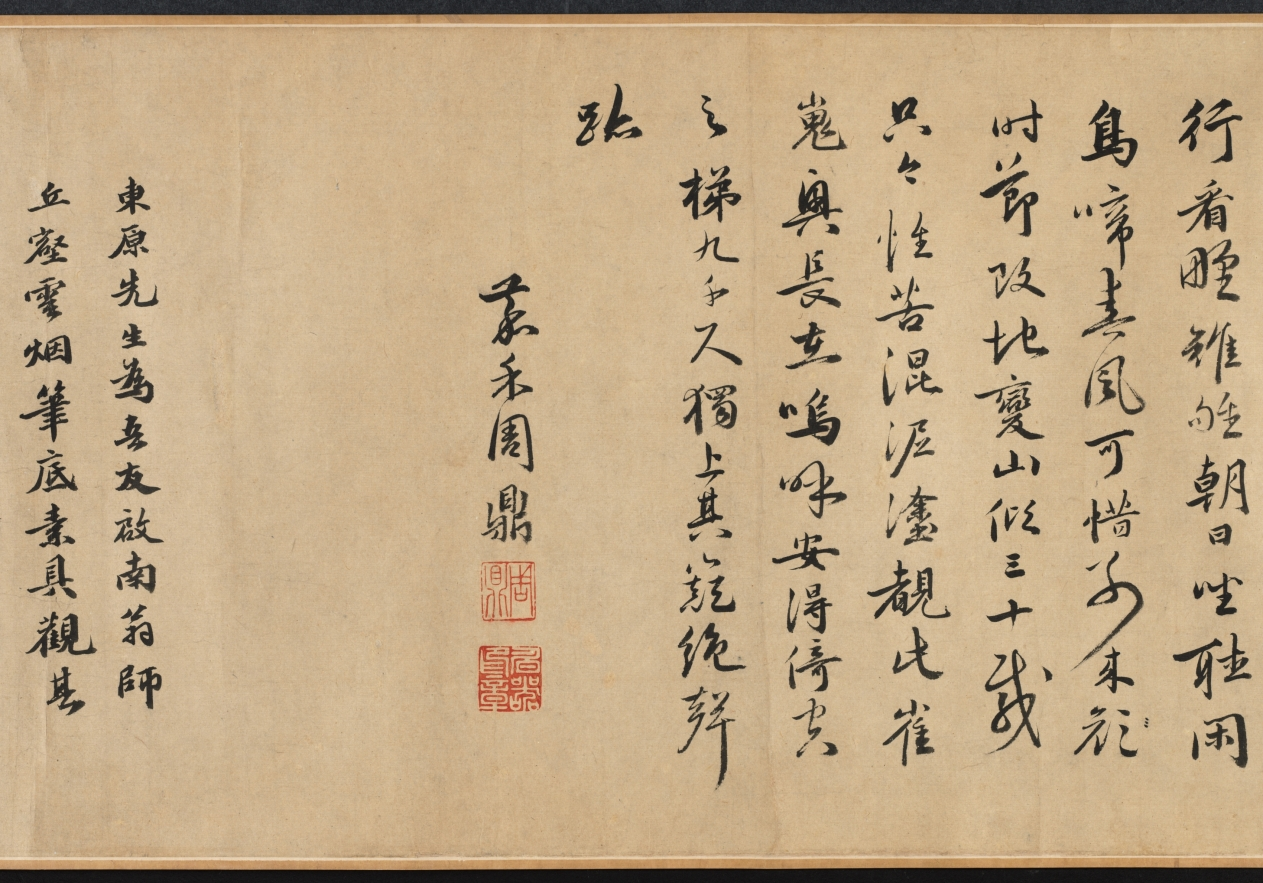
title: Mt. Taibo in the Style of Wang Meng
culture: China, Ming dynasty (1368–1644)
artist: Du Qiong (Chinese, 1396–1474)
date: 1442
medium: handscroll; ink and light color on paper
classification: Painting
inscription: Artist's inscription, signature, and 11 seals: [1 seal] Tung-yüan chai. Huang-ho-shan-ch'iao [Wang Meng] painted a painted called T'ai-po Mountain. Its brushwork is superior and admirable, which is very close to Yu-ch'en [Wang Wei, 699-759]. The cleverness of its composition, the maple groves and rustic temples, the inaccessible ravines and autumnal plateaus, the periolous peaks and strange rocks, etc., all seem to be so natural. The paper is only a little over eight feet, but the landscape has the range of a thousand miles. Once you open and note the contents, it is as if one were roaming among the mountain peaks enveloped in mist and clouds, and forgot the dusty world. When I first saw this, I was so mixed with excitement and joy that I could not take my hands off the painting. So I put it on the table, and tried my best to imitate it, forgetting sleeping and eating for about three months before it was completed. Although I do not dare to tread in the footsteps of Huang-ho shan ch'iao, I took great pains to capture his spirit in composition and colors. I do not know whether it would pass the judgment of the experts. On the fifteenth day of the fifth month, the seventh year of the Cheng-t'ung year [1442], inscribed by Tung-yüan, Tu Chiung. [2 seals] Yung-chia; Ching-chieh ming-men. [8 seals on painting] Tung-yüan chai; Ching-chieh ming-men; Yung-chia; Tu Ch'iung yin; Tung-yüan (repeated 5 times). trans. WKH/LYSL 3 colophons and 7 additional seals: 1 colophon and 2 seals of Chou Ting (1401-1487); 1 colophon and 2 seals of Wu K'uan (1435-1504); 1 colophon, dated 1655, and 2 seals of Lan Ying (1585-after 1664).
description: When a Chinese painter "imitated" a painting by a past master, the intention was never to produce an exact copy. Du Qiong, the Ming painter from Suzhou, is a case in point. The painting style of this handscroll is actually closer to that of Huang Gongwang (1269–1354) than to the style of Wang Meng (about 1301–1385). Both masters were active during the previous dynasty and are among the so-called Four Great Masters of the Yuan dynasty (1279–1368). In this painting, the interplay of styles, including Du Qiong's own, contribute to an inner dimension that is more than visual. Mt. Taibo is located in the province of Zhejiang and is known for its scenic beauty. In this scroll, however, it is not depicted literally. The image is an ideal representation of mountains in southeastern China.